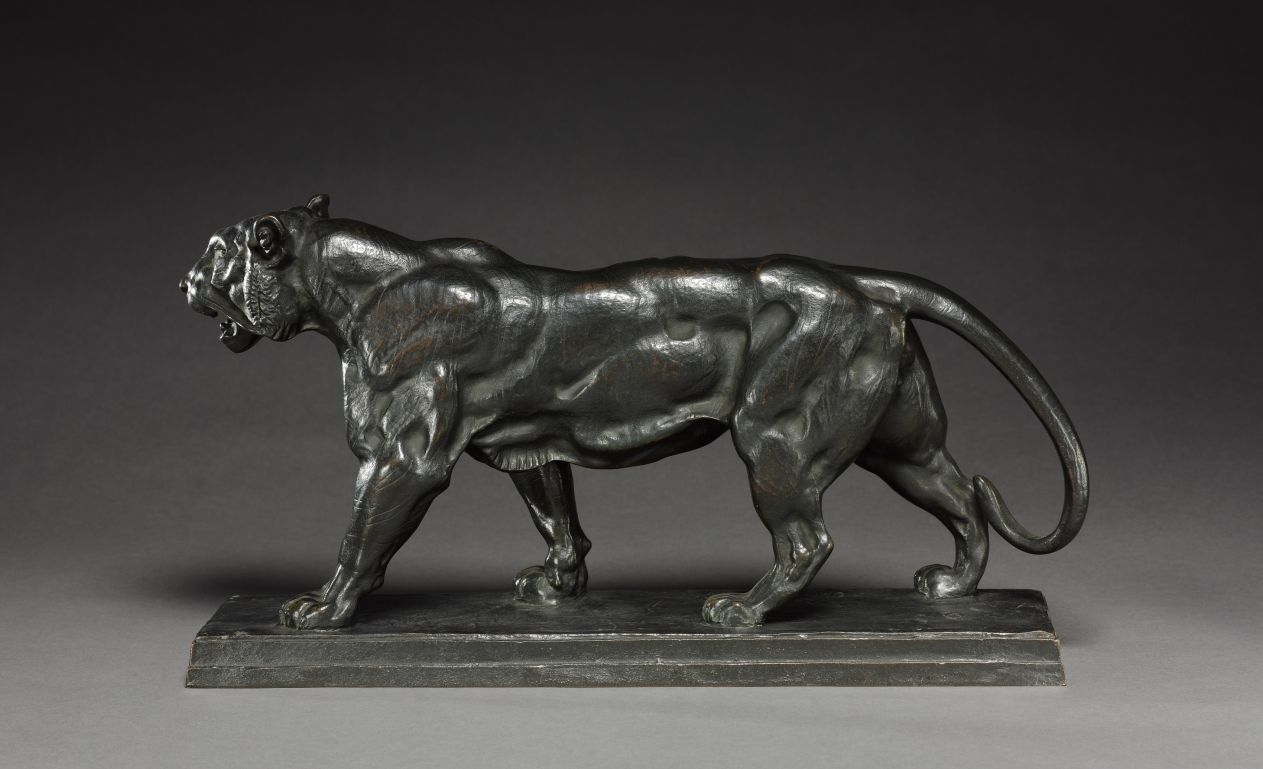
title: Walking Tiger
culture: France, 19th century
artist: Antoine-Louis Barye (French, 1796–1875)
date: c. 1836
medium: bronze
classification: Sculpture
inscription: Signed on base: "Barye"